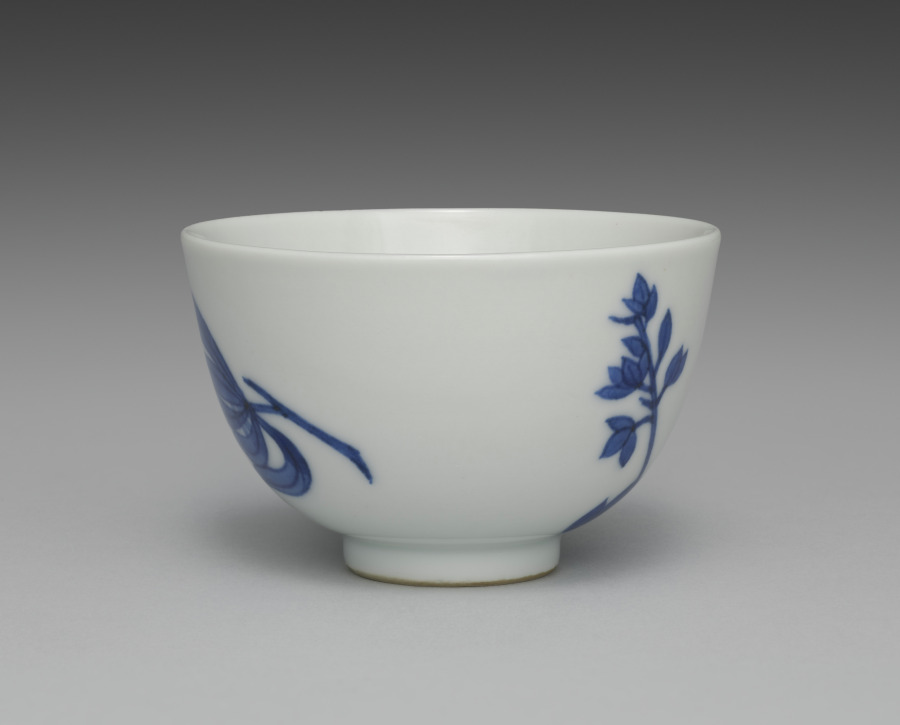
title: Teacup from Tea Set with Orchids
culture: Japan, Meiji period (1868–1912)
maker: Seifū Yohei III (Japanese, 1851–1914)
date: c. 1893–1914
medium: Porcelain with underglaze blue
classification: Ceramic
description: Although the teapot here is stored in a separate box from the five cups, these six pieces may once have been part of a tea set that included other tools such as a water cooler. The teacups have orchid flowers on both sides in underglaze blue, as well as a blue band inside the footring. The teapot has the same design and a blue band painted around the bottom of the lid’s knob. The cups’ long wood storage box is stamped on the exterior, over the lid and base, with a small red seal reading “Satō.” The same seal appears on five small squares of yellow textile, one placed in the bottom of each compartment in the teacup storage box. These are additional to the customary yellow cloths stamped with a “Seifu” seal. Interestingly, four of the Seifū cloths are stamped with an ovoid seal, while the remaining cloth, which is a slightly lighter color, has an unusual seal that is not quite gourd-shaped and with the fū of Seifū in a stylized, unrecognizable form. The teapot has its own box with a Satō seal and is wrapped with an orange textile stamped with the same unusual Seifū seal. A set with a very similar surface design is in the Brooklyn Museum. The Brooklyn set has a water cooler and a small pitcher, in addition to the teapot and cups, and all are in a single storage box. This box records the tea tools as made with kanpakuji, or “bright-jewel white porcelain,” counted among Yohei III’s most important inventions, and carved images. In fact, both sets have a white surface much closer in coloration to the cool white of porcelain clay used in Kyoto at the time, and the designs are simply painted. The Brooklyn set was thus likely mismatched at some point with a box intended for another tea set. Nonetheless, the box may have helped prevent the set’s original components from being dispersed, and the set itself provides insight into how the other tools from the present set may have looked.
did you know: This tea set with orchids has a side-handled pot called a kyūsu, used for steeping, straining, and serving tea.